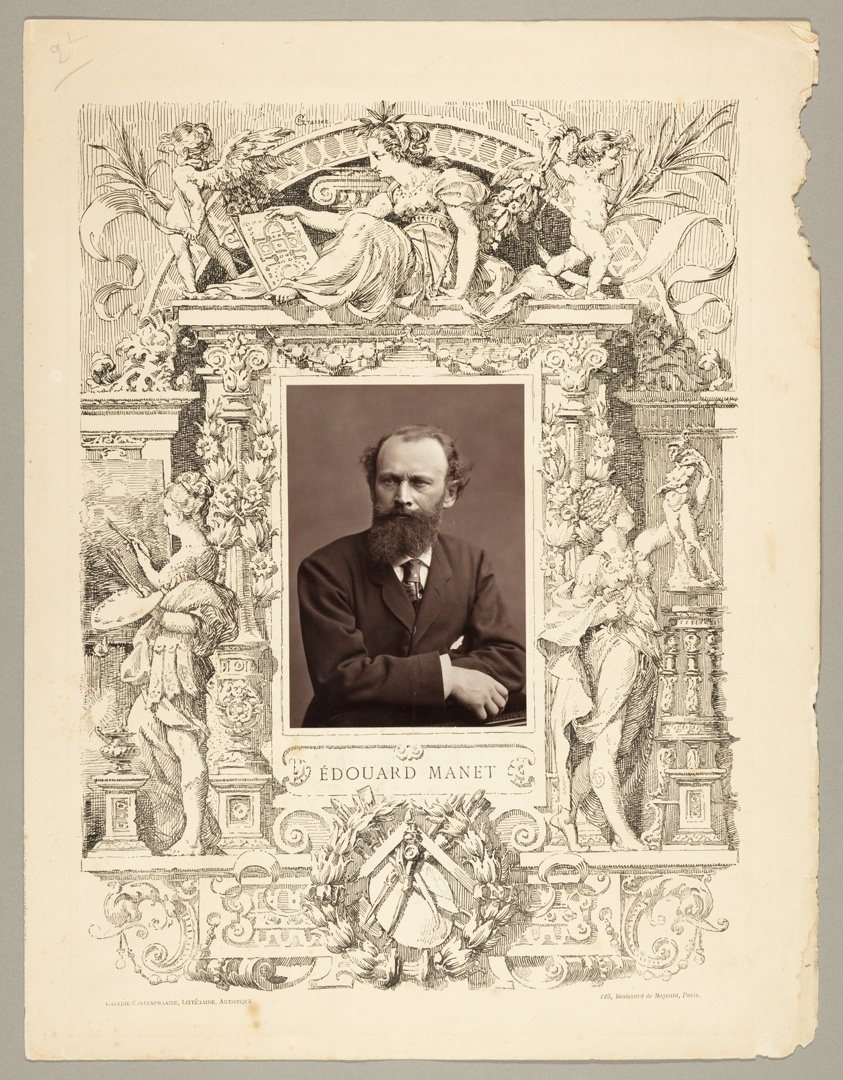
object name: Photograph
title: Édouard Manet (French painter, 1832-1883)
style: 19th century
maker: Nadar (Gaspard Félix Tournachon) (French, 1820–1910)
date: 1865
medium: Woodburytype, from the periodical “Galerie Contemporaine Littéraire, Artistique” (1876), volume 1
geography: France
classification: woodburytype; photomechanical process; photography; photograph